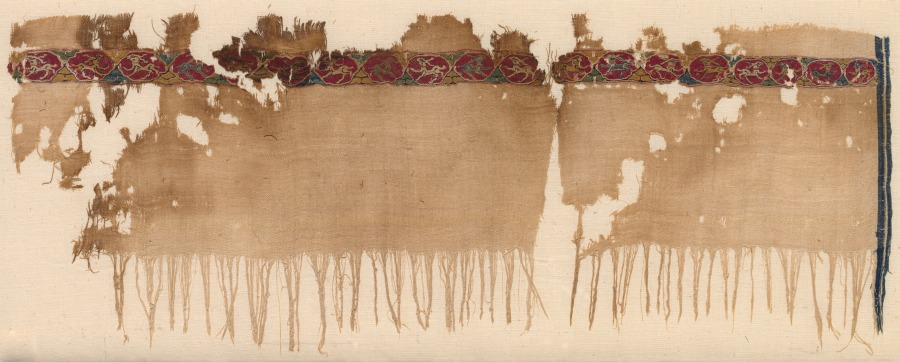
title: Fragment of a Tiraz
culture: Egypt, Fatimid period, late 11th century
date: 1080 – 1099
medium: tabby ground with inwoven tapestry ornament; linen and silk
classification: Textile